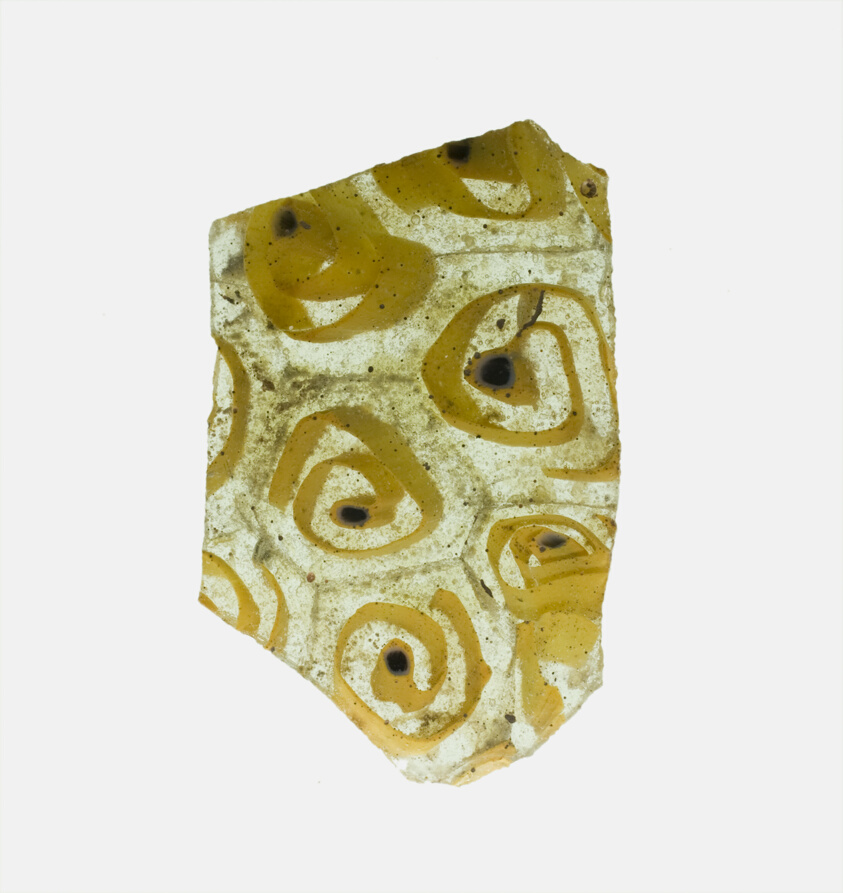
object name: Decorative Arts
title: Fragment of a Bowl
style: roman (ancient, style or period), ancient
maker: Roman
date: 1st century BCE–1st century CE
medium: Glass, mosaic glass technique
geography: Roman Empire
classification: fragment; decorative arts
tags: decoration